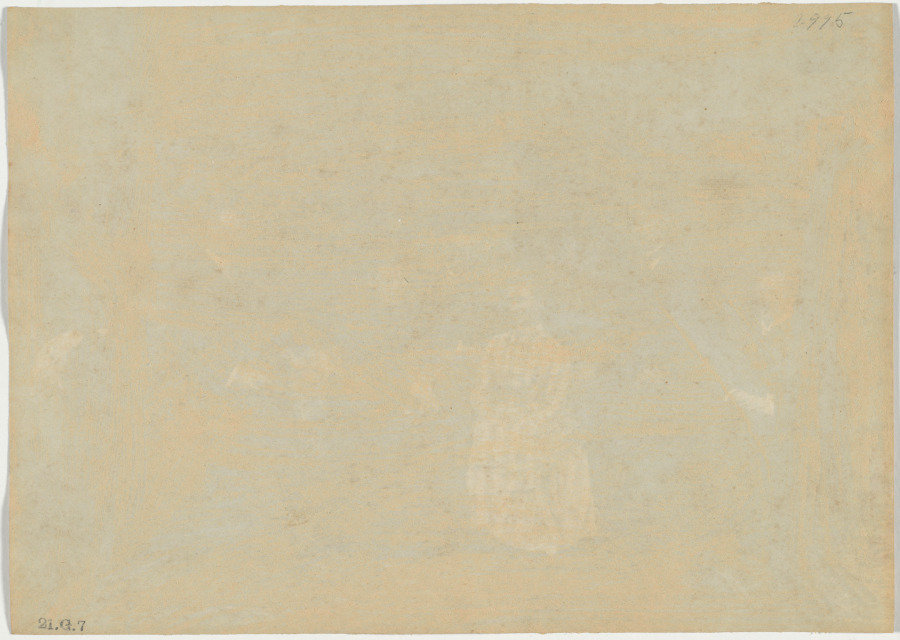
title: His Honor The Lieutenant Governor of the Punjab and Party, Shimla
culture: India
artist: Raja Deen Dayal (Indian, 1844–1905)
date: 1887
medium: albumen print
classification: Photograph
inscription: Stamped in black ink on verso: “21.G.7” Written in pencil on verso: “2995”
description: This photograph may commemorate a family reunion of the Lyalls. In 1887 James Lyall (1838–1916) (possibly on the left) was appointed lieutenant governor of the Punjab region, the same year that his elder brother Alfred Lyall (1835–1911) (second from left) retired as lieutenant governor of North-Western Provinces. After recovering from a serious illness, Alfred visited James in Simla. The women are likely Alfred’s daughter Mary Evelina Lyall (1868–1948) (left) and “Mrs. Lyall,” possibly Mary’s aunt, James Lyall’s wife. A master at staging group portraits, Deen Dayal used symmetry, proximity, height, and other formal devices to indicate the sitters’ interrelationships and relative ranks.